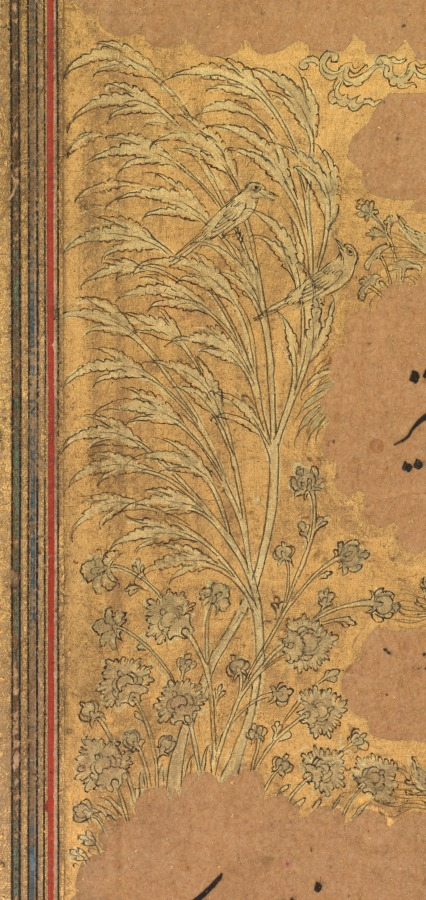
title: From Dohras (Songs) 40 and 36 from the Kitab-i Nauras of Sultan Ibrahim Adil Shah II (verso)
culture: India, Bijapur, Deccan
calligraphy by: Khalilullah Butshikan (Persian, active in India 1596–c. 1620)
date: 1618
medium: ink with two-tone gold on paper, double-sided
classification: Painting